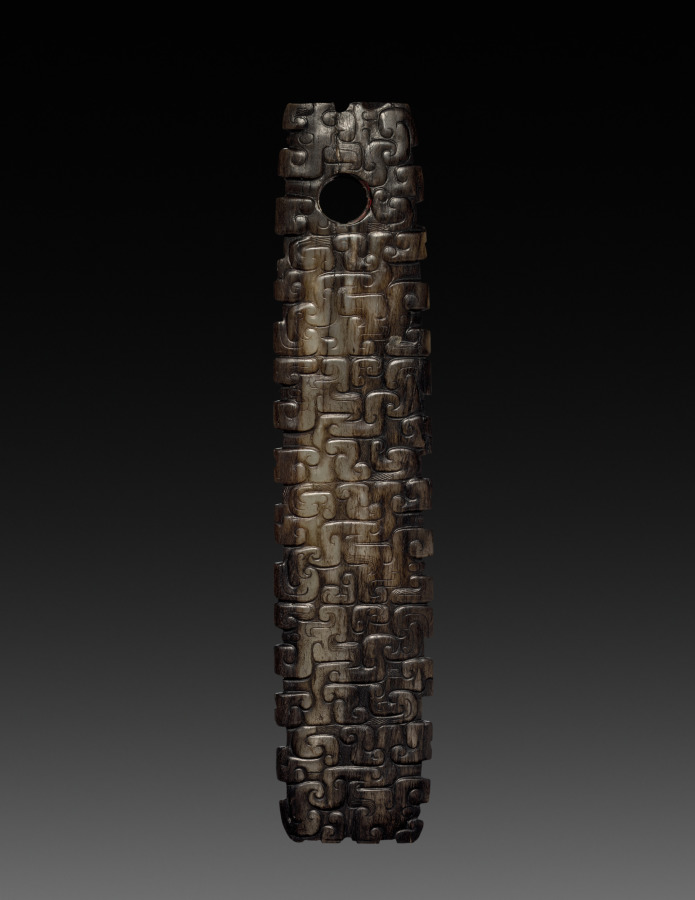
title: Jade Scepter with Interlocking Pattern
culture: China, Eastern Zhou dynasty (770–256 BCE)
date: c. 600–400 BCE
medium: nephrite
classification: Jade